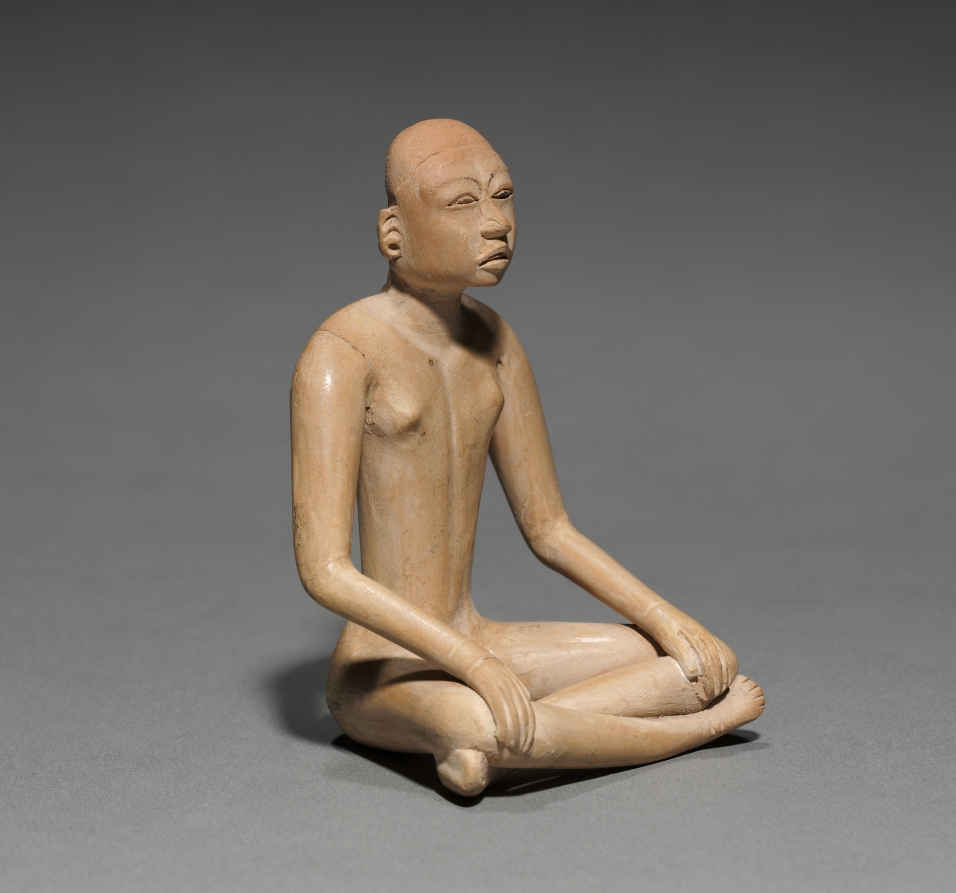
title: Seated Figurine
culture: Mexico, Gulf Coast, Huastec, Pánuco style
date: 1–700 CE (thermoluminescence date, 225–1055 CE)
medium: earthenware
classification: Sculpture